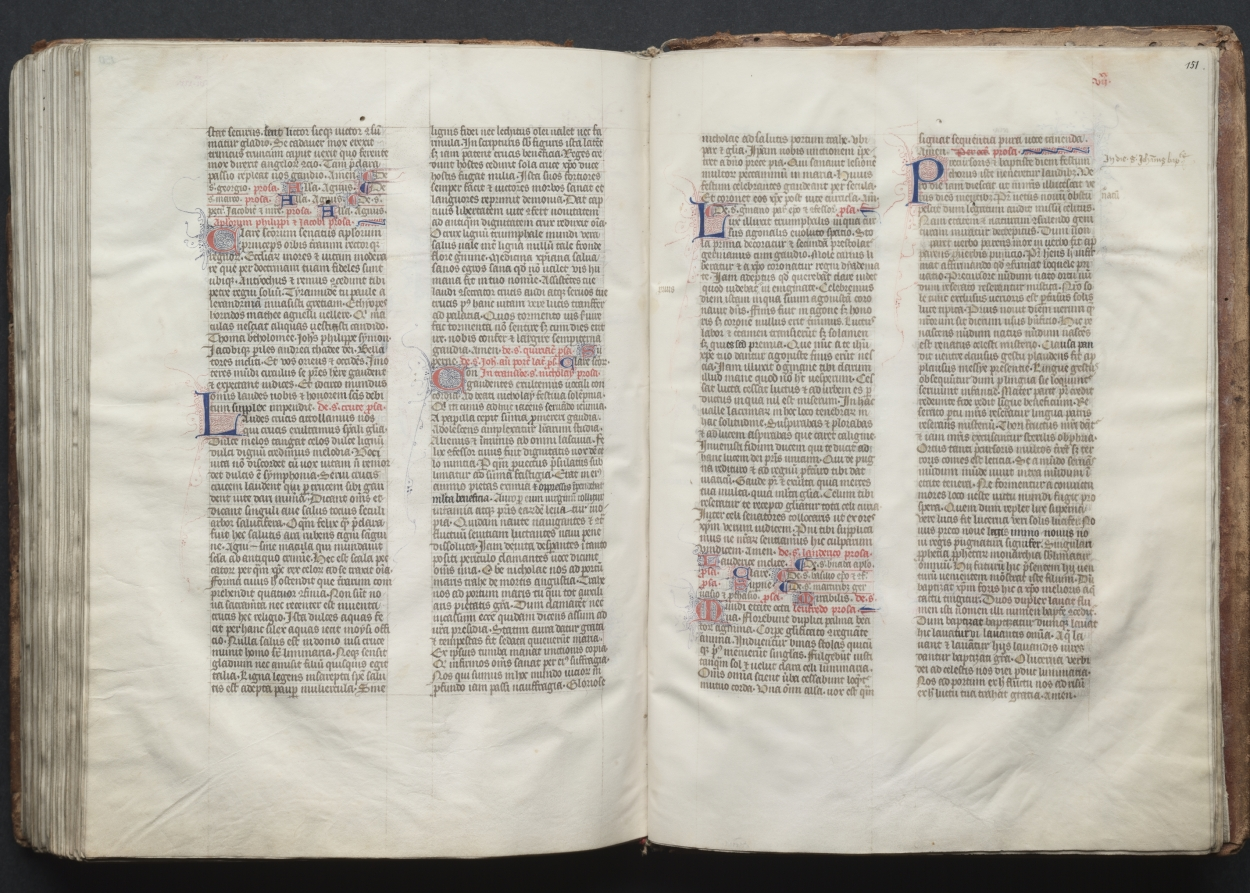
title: The Gotha Missal: Fol. 150v, Text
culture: France, Paris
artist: Master of the Boqueteaux (French)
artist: and Workshop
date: c. 1375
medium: ink, tempera, and gold on vellum; blind-tooled leather binding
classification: Bound Volume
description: The style and quality of this manuscript's decoration is typical of deluxe Parisian books made for aristocratic or royal patrons. Most of the book's decoration appears to be the work of the Master of the Boqueteaux, an artist active at the court of King Charles V (died 1380). His style was apparently shared by a number of book illuminators working in and around Paris. It is very possible that the Gotha Missal belonged to Charles V, but is not provable because the manuscript has no royal portraits and lacks a colophon. Given the book's magnificent decoration, however, it would seem that it was produced for a Valois prince, if not for the king himself. The manuscript receives its name from the German dukes of Gotha, its later owners.